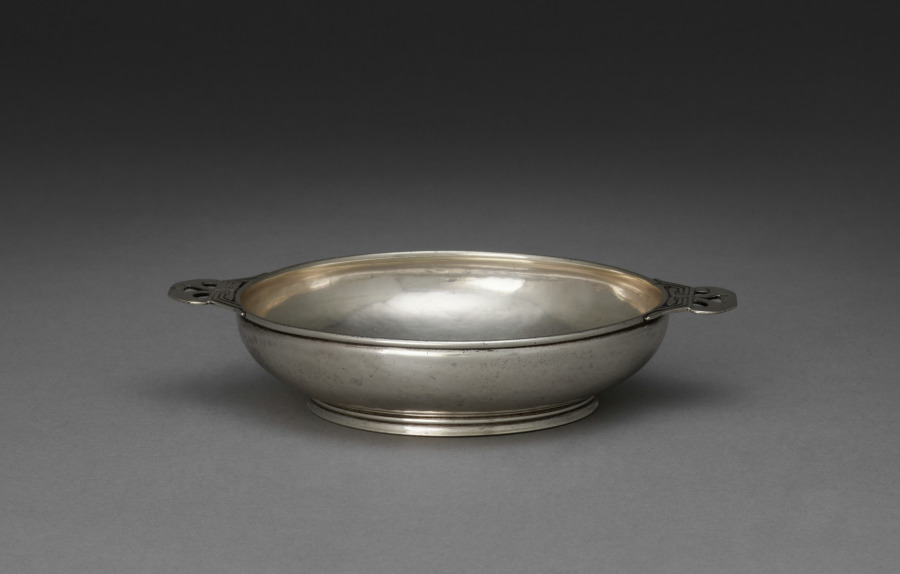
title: Bowl with Two Handles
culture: Denmark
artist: firm of Georg Jensen (Danish, 1866–1935)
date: c. 1925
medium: silver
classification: Silver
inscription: engraved on bottom: "TEDDY BILL MARCH 27, 1926."